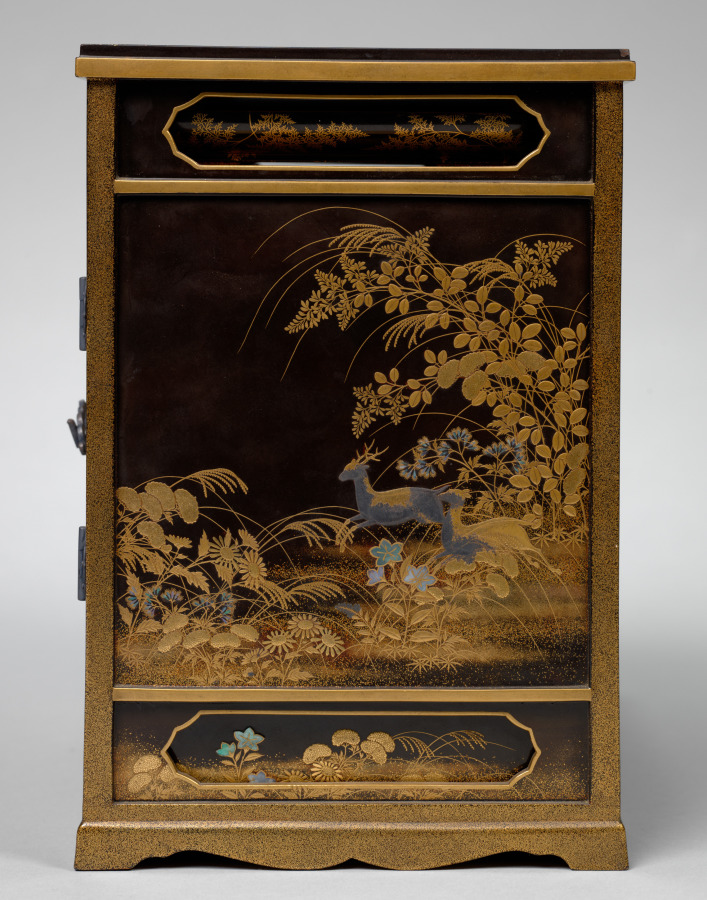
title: Ten-Round Incense Game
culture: Japan, Edo period (1615–1868)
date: 1700s–mid-1800s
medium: Lacquered wood with gold and silver sprinkled powder (maki-e) and mother-of-pearl inlay, metal fittings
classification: Lacquer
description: A popular pastime in the Edo period was a game in which a group of players passed around incense and guessed its name or scent. Small pieces of incense would be placed on thin mica plates and heated over hot ash, releasing their aroma for the players to smell. Players then cast their guesses with playing pieces. The game master kept score with the writing set. This game is handsomely decorated with images of deer in an autumn setting.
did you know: The blue and white porcelain containers in which the heated incense was passed feature designs of foreigners.